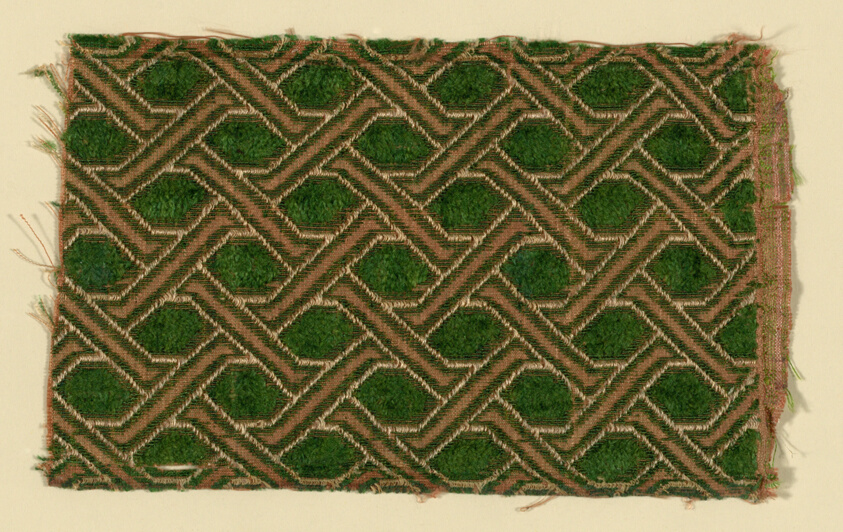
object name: Textile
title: Fragment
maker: Italy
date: 1625/75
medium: Silk, plain weave with supplementary binding wefts and two-color supplementary pile warps forming cut, uncut, and voided velvet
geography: Italy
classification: textile; weaving - velvet